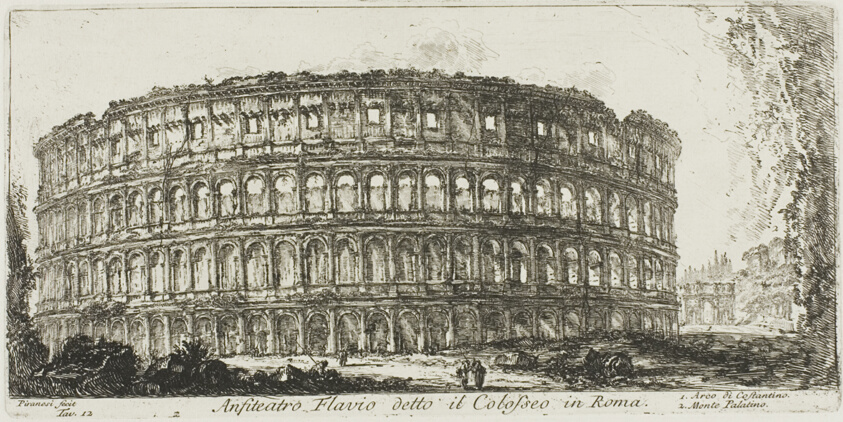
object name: Print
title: Flavian ampitheater, called the Colosseum. 1. Arch of Constantine. 2. Palatine Hill, plate 12 from Some Views of Triumphal Arches and other Monuments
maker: Giovanni Battista Piranesi (Italian, 1720-1778)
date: 1748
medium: Etching on ivory laid paper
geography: Italy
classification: etching; print; prints and drawing